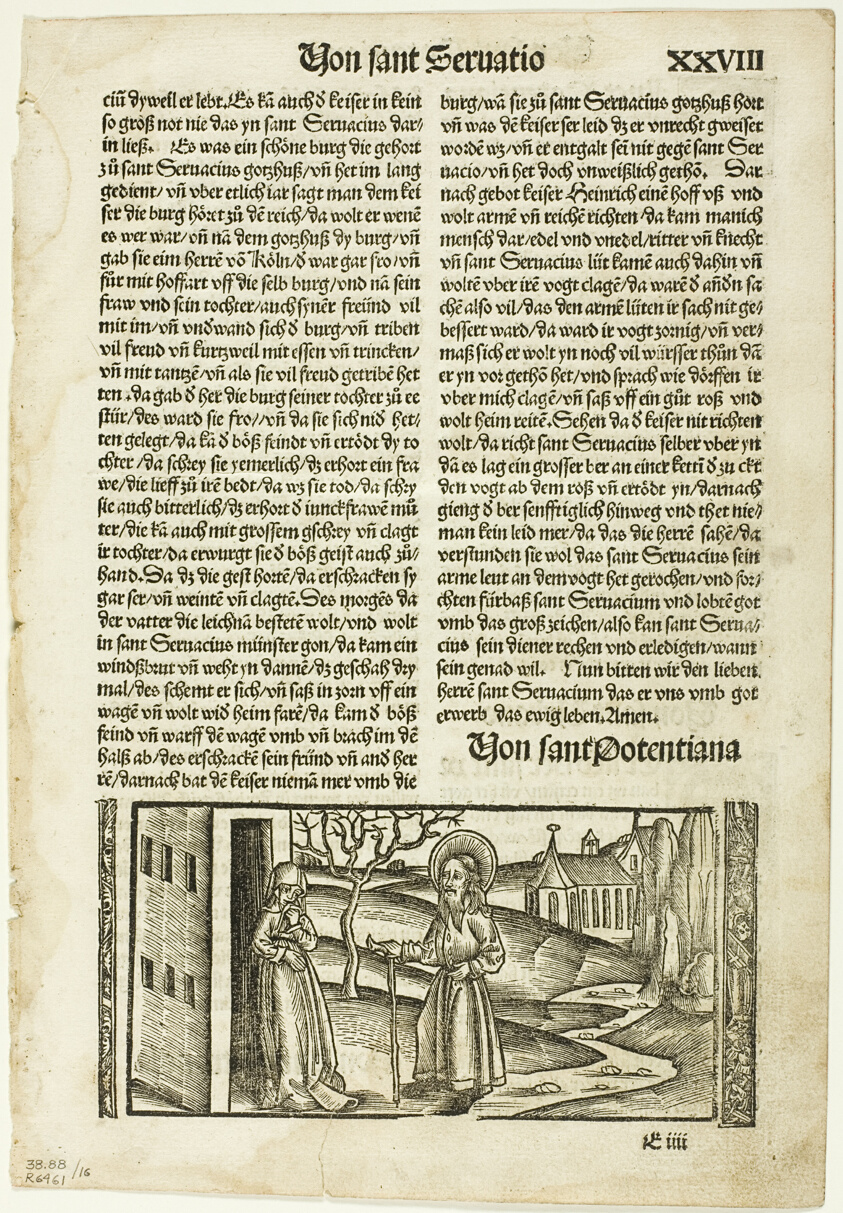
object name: Print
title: Illustration from Das Leben der Heiligen, plate sixteen from Woodcuts from Books of the XVI Century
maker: Unknown Artist (German, 16th century); assembled by Max Geisberg (Swiss, 1875-1943)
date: 1513, assembled into portfolio 1937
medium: Woodcut on paper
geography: Germany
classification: woodcut; print; prints and drawing